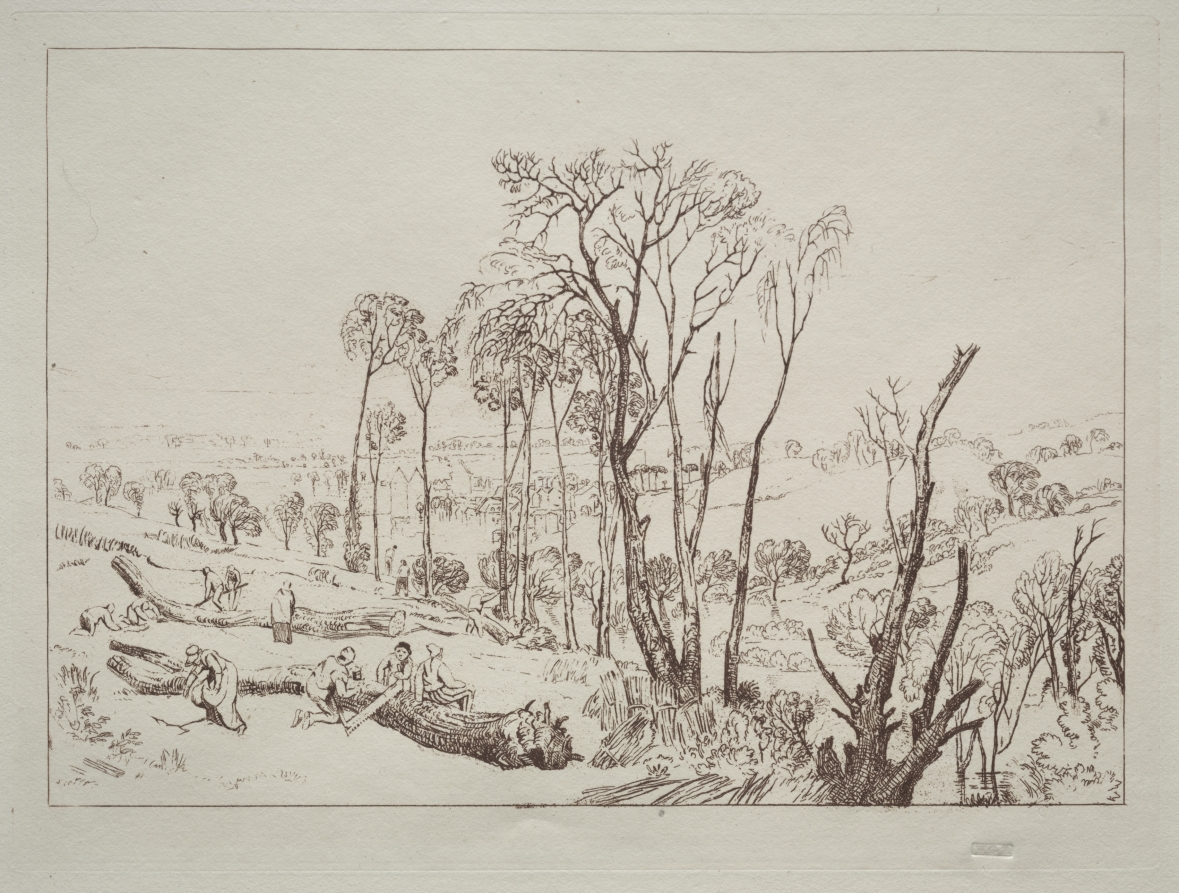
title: Liber Studiorum: Crowhurst, Sussex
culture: England, 19th century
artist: Joseph Mallord William Turner (British, 1775–1851)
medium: etching and mezzotint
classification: Print